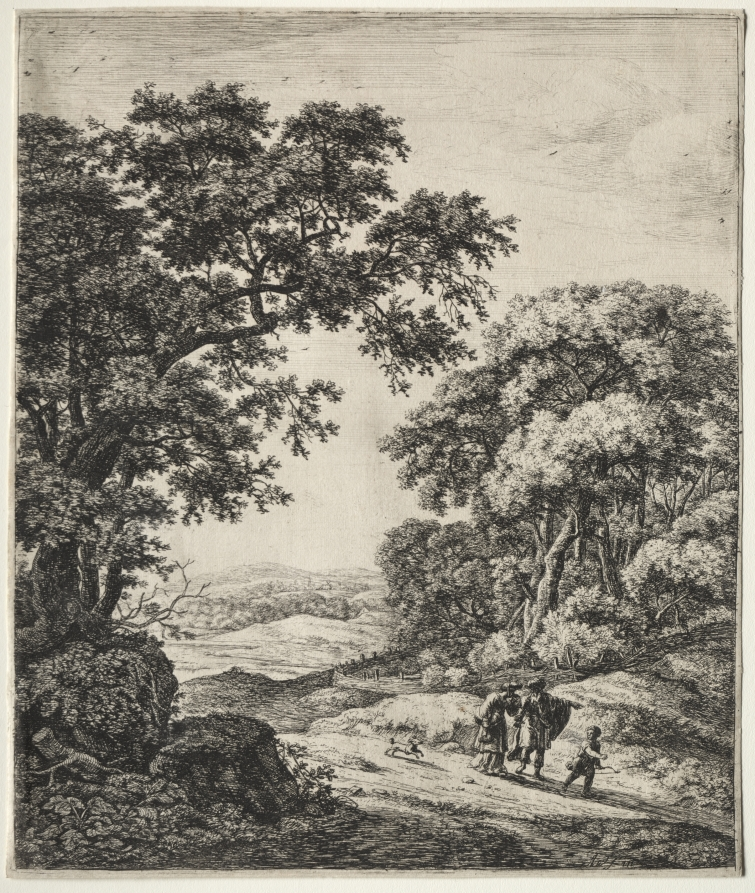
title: Six large upright landscapes with scenes from the Old Testament: Abraham Dismissing Hagar and Ishmael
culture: Netherlands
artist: Anthonie Waterloo (Dutch, 1609/10–1690)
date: 1640–90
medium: etching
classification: Print